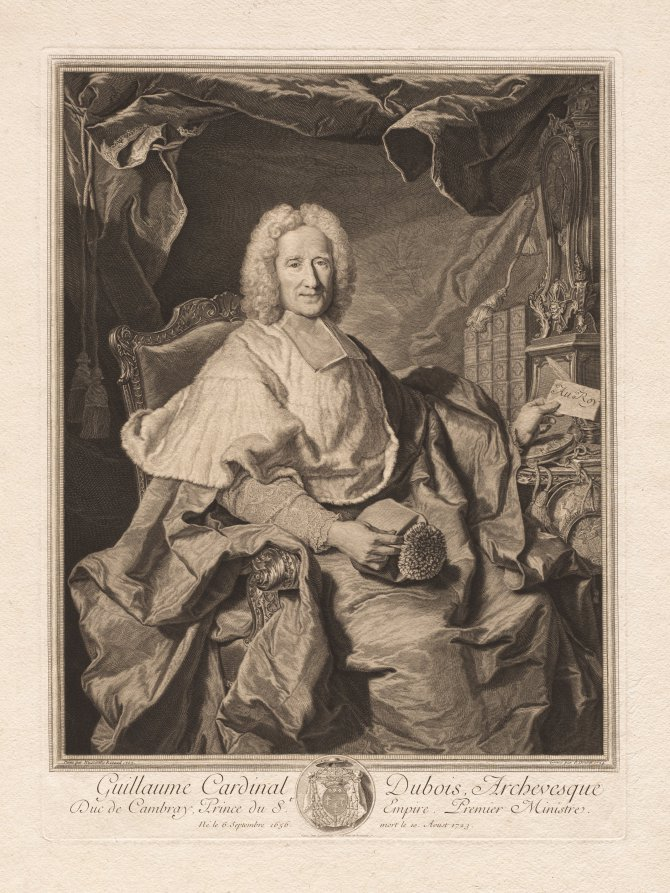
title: Cardinal Dubois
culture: France, 18th century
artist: Pierre-Imbert Drevet (French, 1697–1739)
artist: after Hyacinthe Rigaud (French, 1659–1743)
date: 1724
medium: engraving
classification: Print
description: One of the most powerful people in France at the beginning of the 18th century, Cardinal Guillaume Dubois (1656–1723) holds a letter addressed Au Roy, or “To the King.” The engraving reproduces a painting commemorating Louis XV’s ascendance to the throne in 1723.